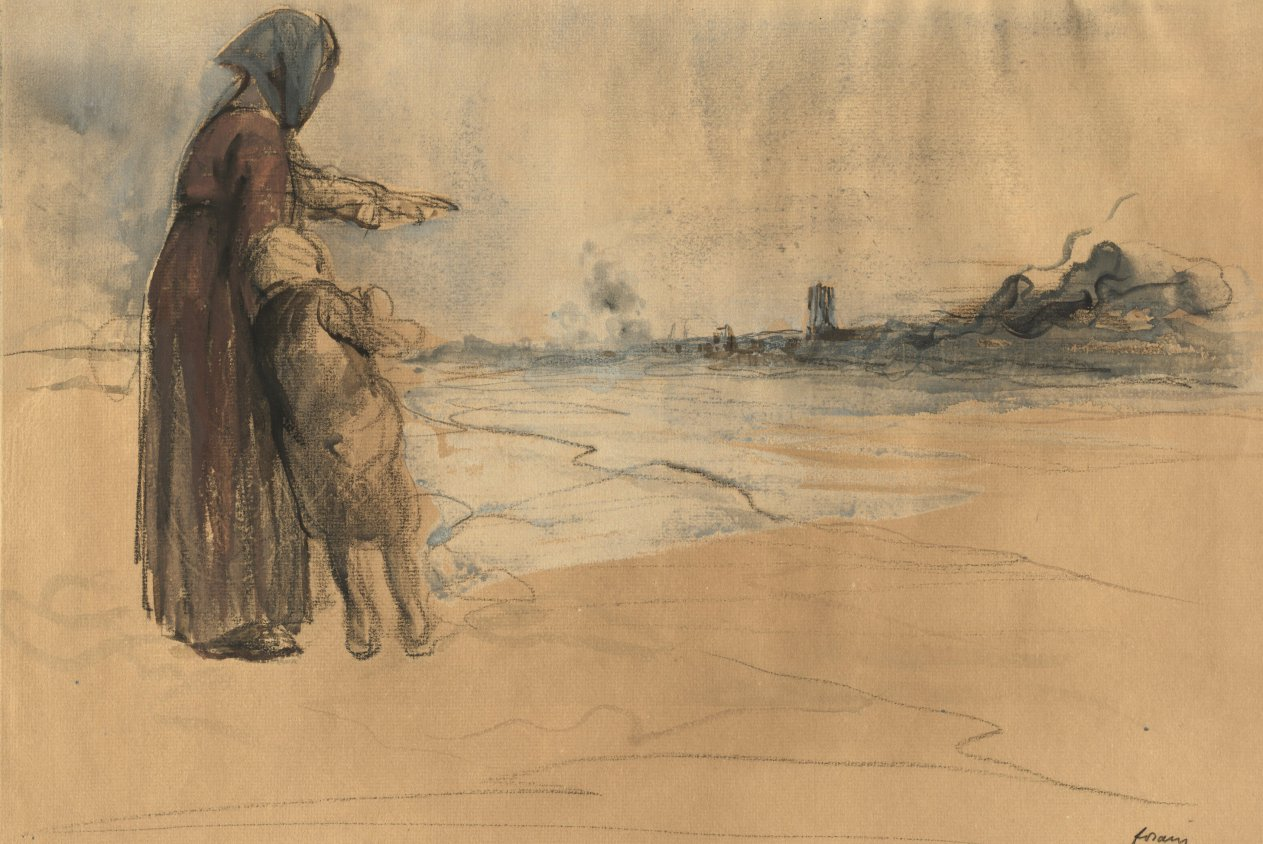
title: It Was Our House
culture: France, late 19th-early 20th Century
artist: Jean Louis Forain (French, 1852–1931)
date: fourth quarter 1800s or first third 1900s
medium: black crayon, gouache and watercolor; framing lines in black crayon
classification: Drawing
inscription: signed, lower right, in black crayon: forain